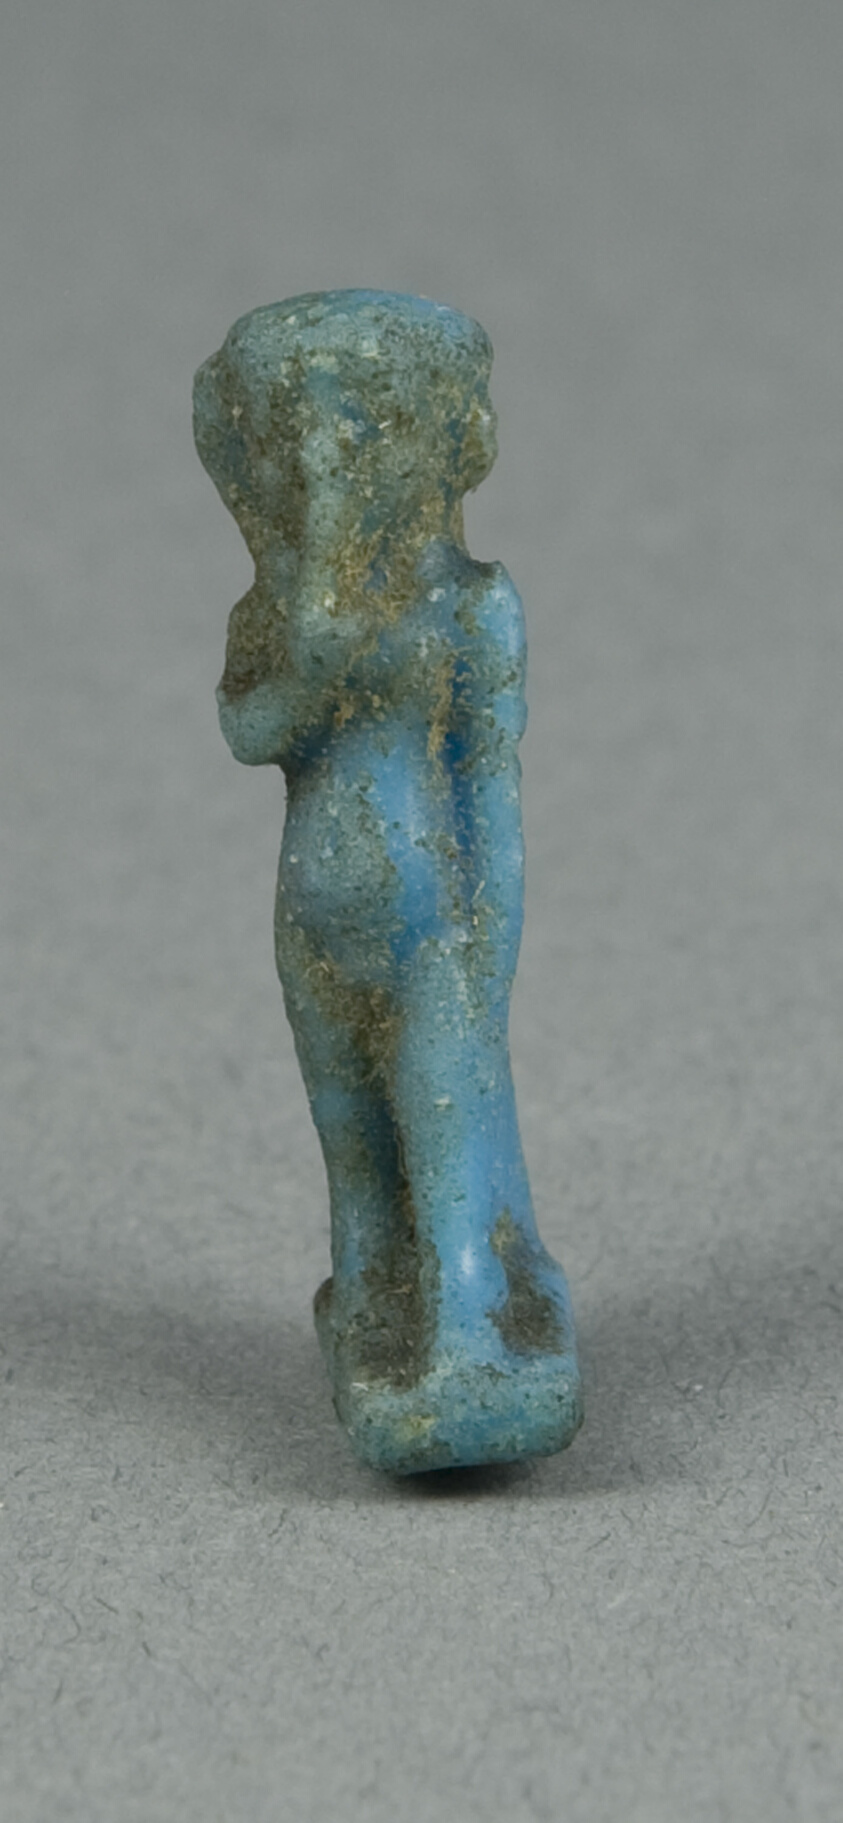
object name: Costume and Accessories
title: Amulet of the God Harpocrates (Standing)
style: egyptian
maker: Egyptian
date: Late Period, Dynasty 26–31 (664–332 BCE)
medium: Faience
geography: Egypt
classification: amulet; jewelry; ceramics; ancient art; costume; faïence (composite material)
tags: gods (deities)